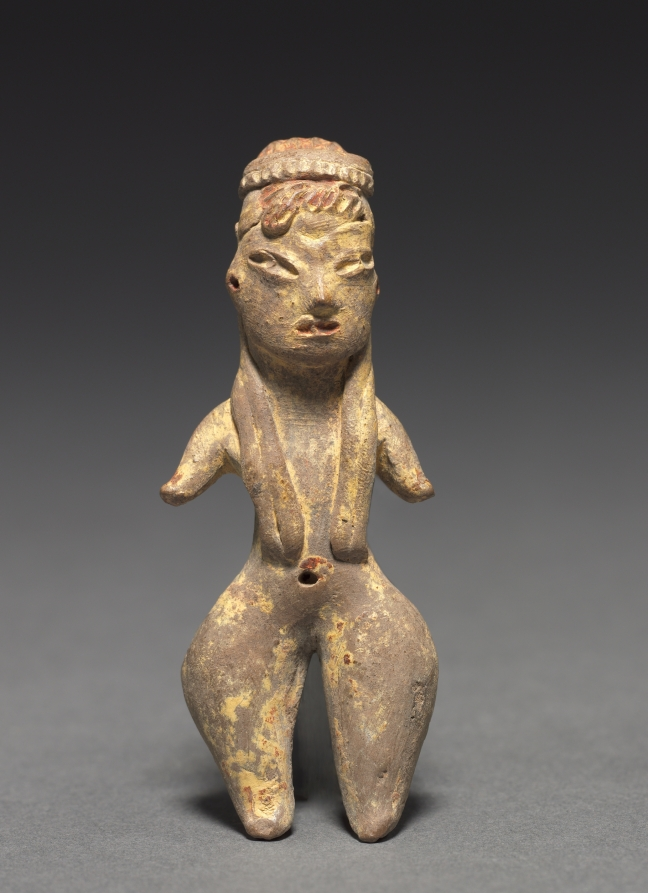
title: Standing Female Figurine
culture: Mesoamerica, Central Mexico, Tlatilco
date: 1200–400 BCE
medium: Ceramic, pigment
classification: Ceramic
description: This figurine represents the best-known type found in graves at Tlatilco, an early farming village on the outskirts of Mexico City. The type is known as the “pretty lady” after its representatives’ sweet faces, fancy hairstyles, pinched waists, and flaring hips and thighs.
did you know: This figurine represents the best-known type found in graves at Tlatilco, an early farming village.